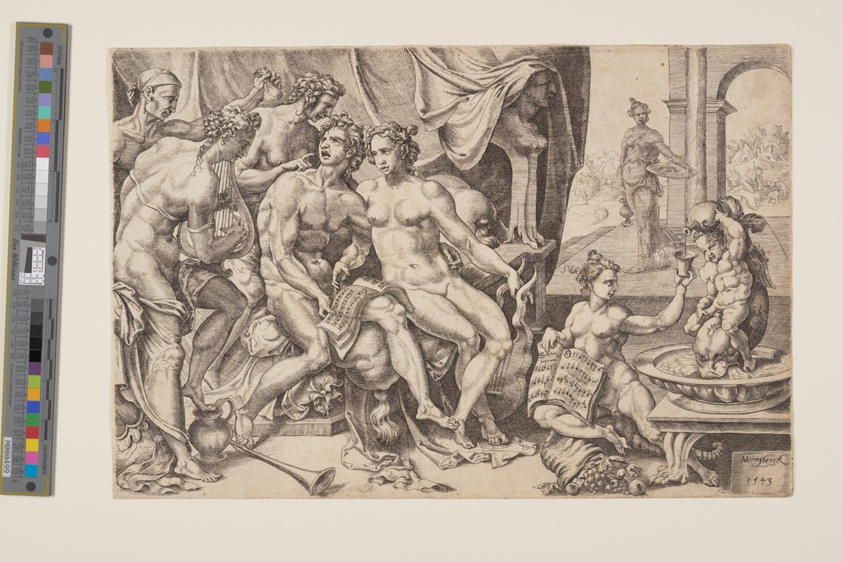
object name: Print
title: The Prodigal Son Squandering his Inheritance on Harlots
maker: Cornelis Bos (Flemish, c. 1510-before 1566); after Maerten van Heemskerck (Dutch, 1498–1574)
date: 1543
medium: Engraving on ivory laid paper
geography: Flanders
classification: print; paper; prints and drawing; engraving